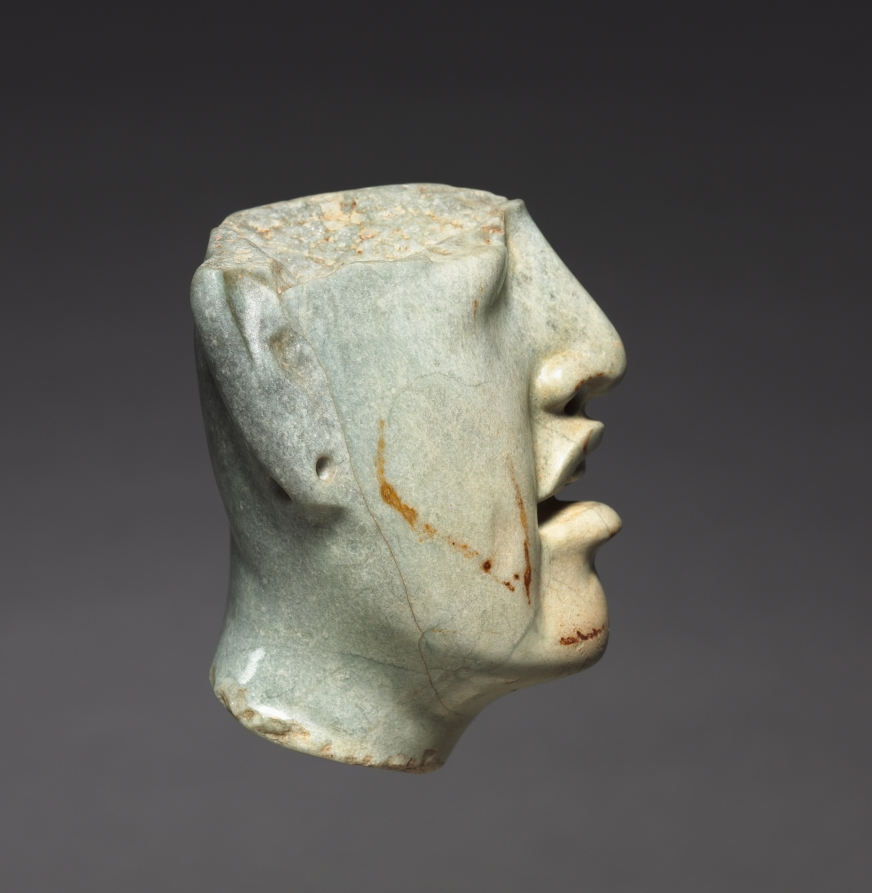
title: Head Fragment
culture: Mesoamerica, Mexico, Olmec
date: c. 900–300 BCE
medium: jadeite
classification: Jade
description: This sensual head fragment may come from a seated or standing figure like those shown nearby, though much larger. The carving is exceptionally fine, from the slight under-eye puffiness to the delineation of the fleshy lips and the teeth. The profile face of supernatural being is incised just in front of each ear, perhaps indicating that the subject had special power.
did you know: In ancient Mesoamerica, jade was more valuable than gold.